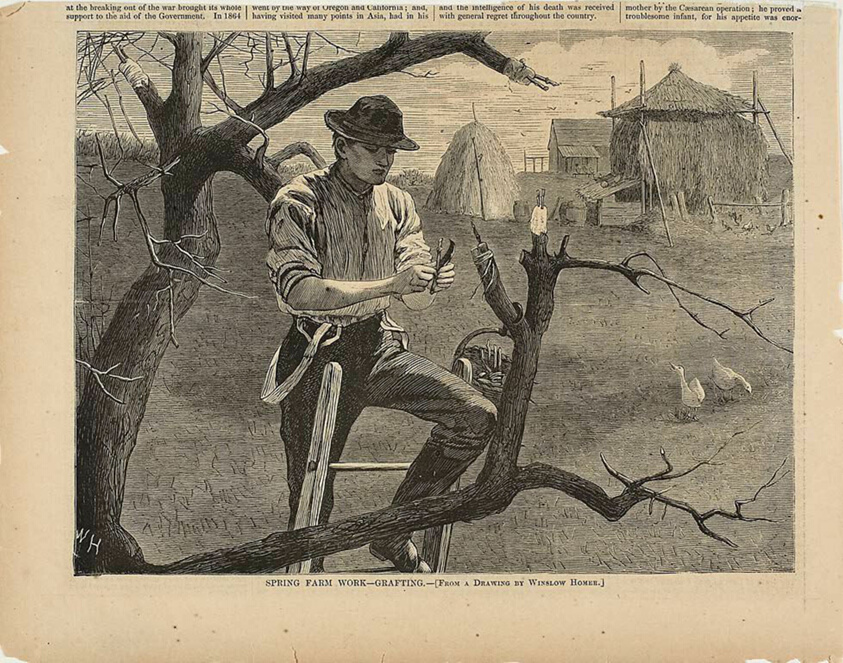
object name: Print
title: Spring Farm Work—Grafting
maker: Winslow Homer (American, 1836-1910); published by Harper's Weekly (American, 1857-1916)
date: published April 30, 1870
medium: Wood engraving on paper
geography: United States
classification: wood engraving; print; prints and drawing